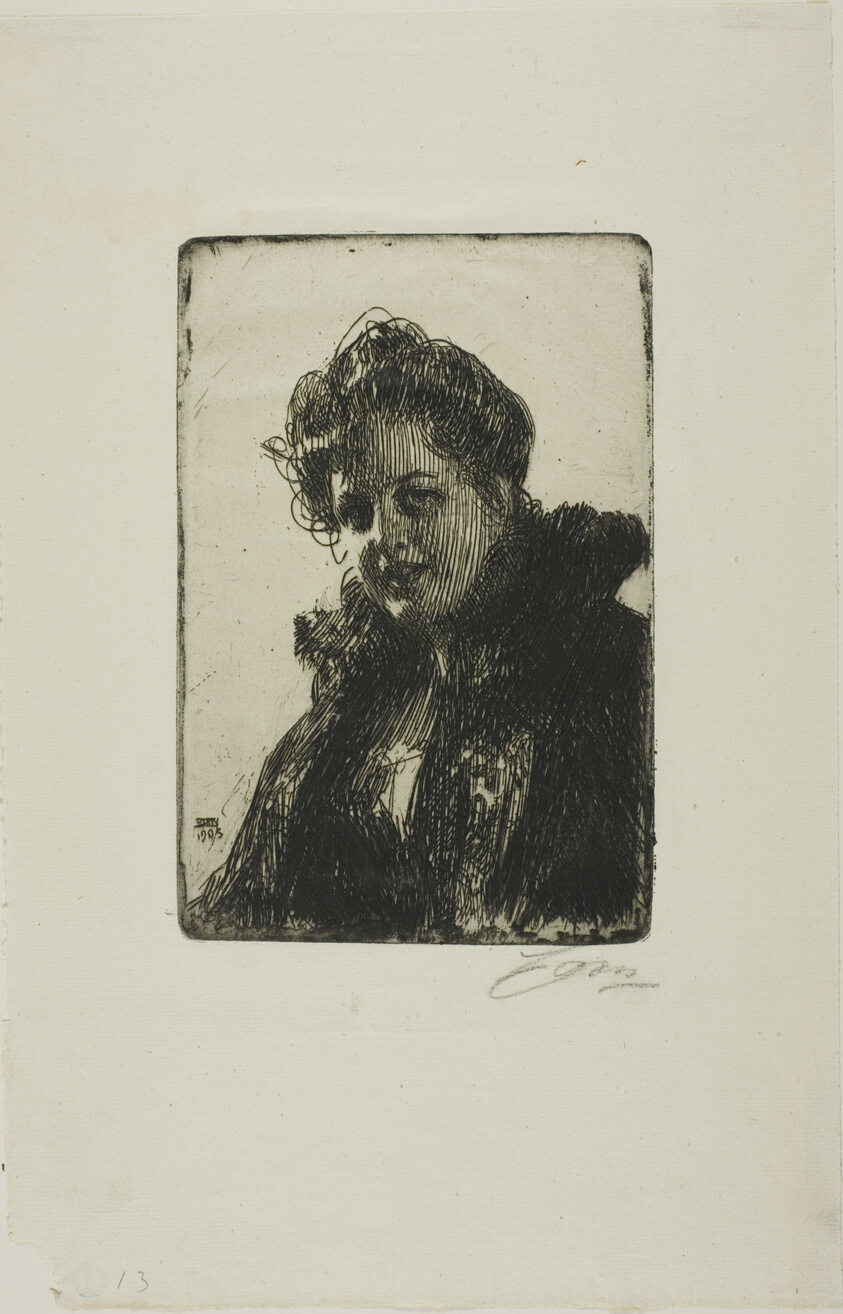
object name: Print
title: Mrs. Granberg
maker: Anders Zorn (Swedish, 1860-1920)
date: 1903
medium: Etching on ivory laid paper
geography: Sweden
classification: etching; print; prints and drawing